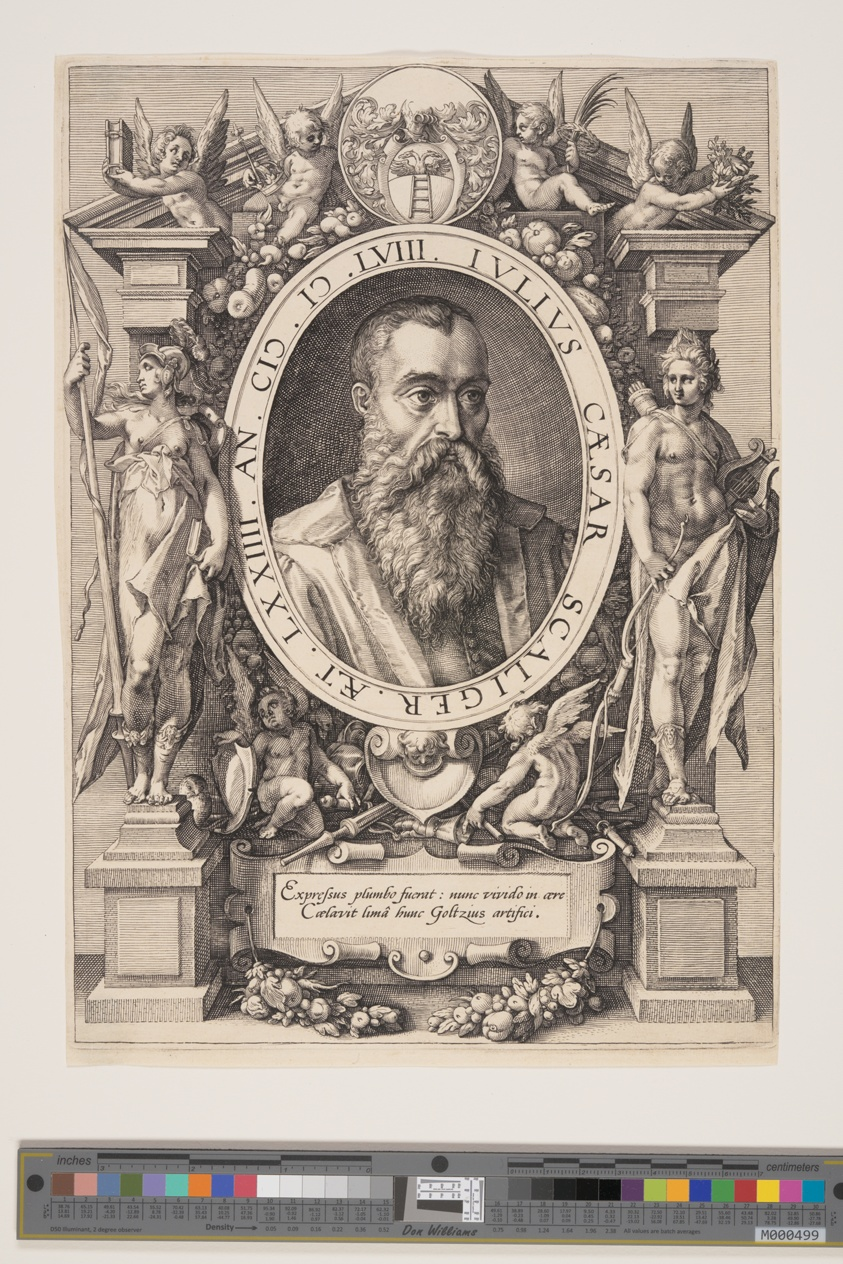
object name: Print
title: Portrait of Julius Caesar Scaliger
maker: Hendrick Goltzius (Dutch, 1558–1617)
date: 1592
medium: Engraving on laid paper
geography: Netherlands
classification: engraving; paper; print; prints and drawing